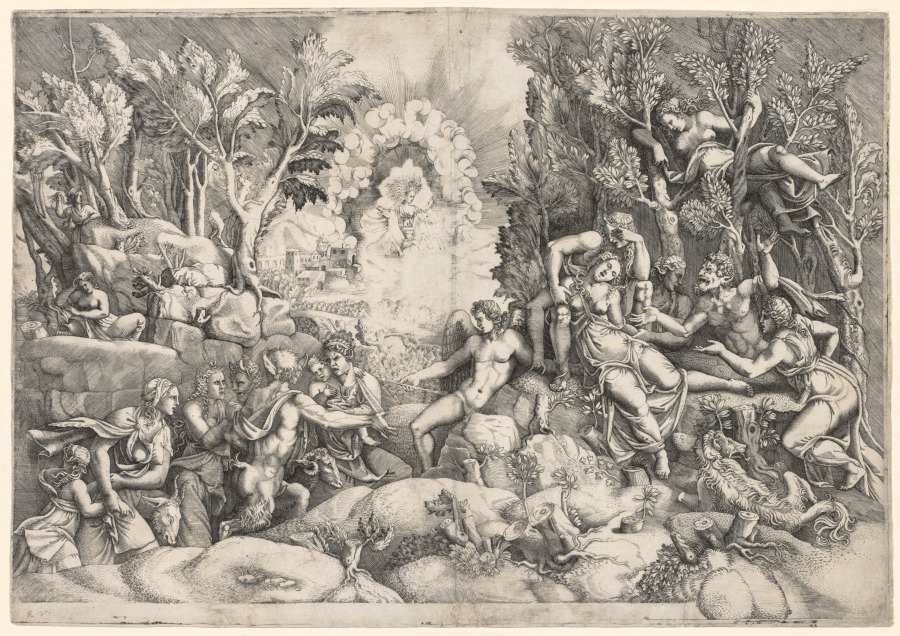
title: The Death of Procris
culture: Italy, 16th century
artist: Giorgio Ghisi (Italian, 1520–1582)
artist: after Giulio Romano (Italian, 1492/99–1546)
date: c. 1540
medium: engraving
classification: Print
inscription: lower left, in pen and brown ink: R.V.; lower right, in graphite: G Ghisi[?erased] ; VERSO, upper right, in graphite: 6[circled] ; lower left, in graphite: APG7762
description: In the complicated tale of Procris and Cephalus, told by the poet Ovid (43 BC–AD 17), jealousy tragically thwarts their true love and fidelity. Fearing that Cephalus loves a nymph, Procris spies on her husband while he is hunting. When Cephalus hears Procris rustling in the woods, he mistakes her for game and throws his magical spear that never misses its mark. In this print, the chorus of expressive satyrs and nymphs mourning her death highlights the heartbreaking drama of this love story. Romano’s intricate composition also includes Aurora, the goddess of dawn, in her chariot, and distant buildings that refer to the couple’s home in Athens.